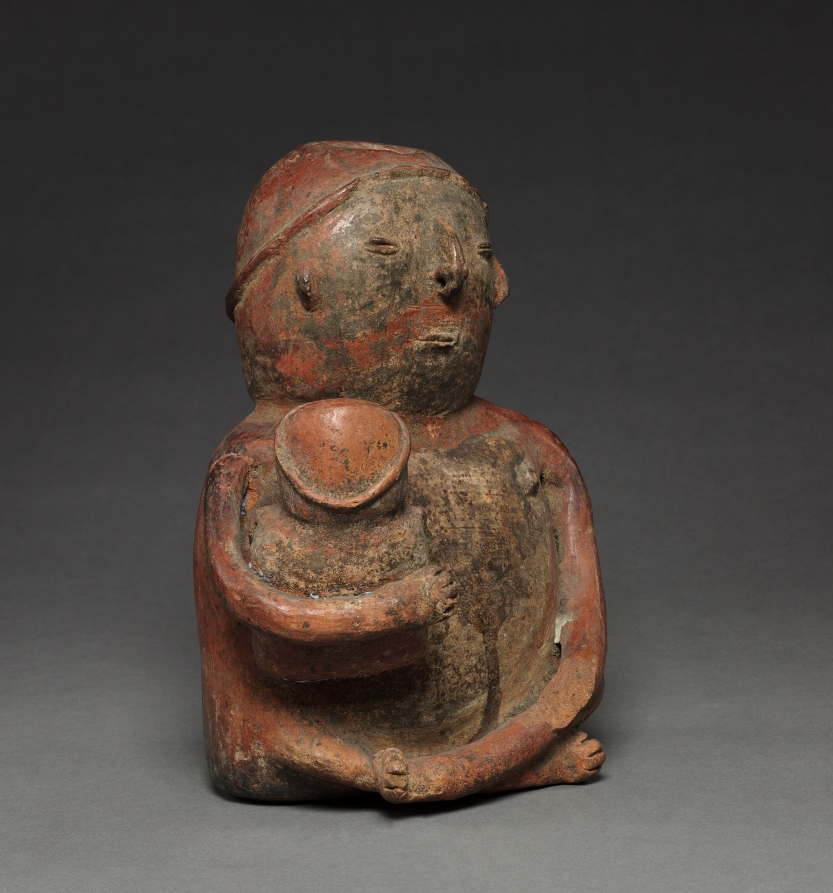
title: Figures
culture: Colombia, 18th-19th century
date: before 1921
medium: red ware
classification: Ceramic